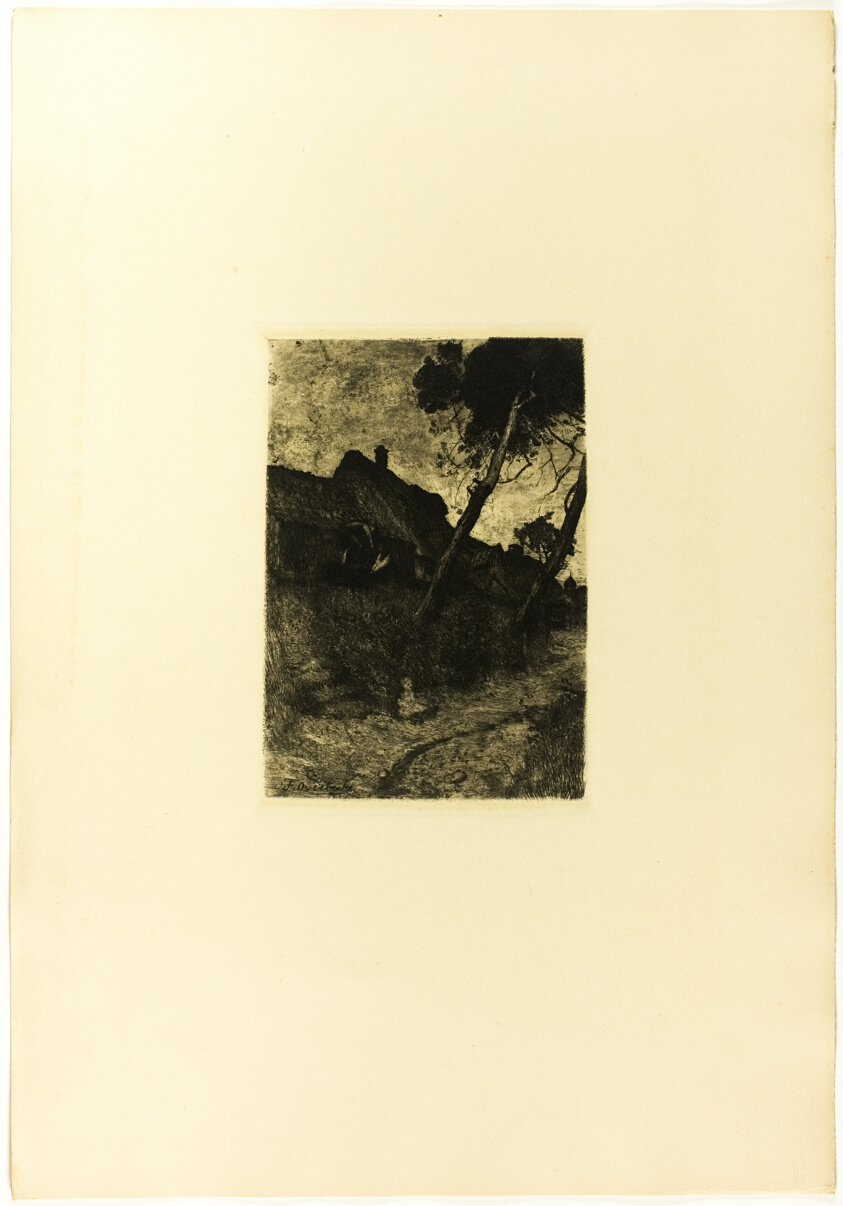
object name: Print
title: Blacksmith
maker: Fritz Overbeck (German, 1869-1909)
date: 1895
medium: Etching on cream wove paper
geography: Germany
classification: etching; prints and drawing; print; portfolio